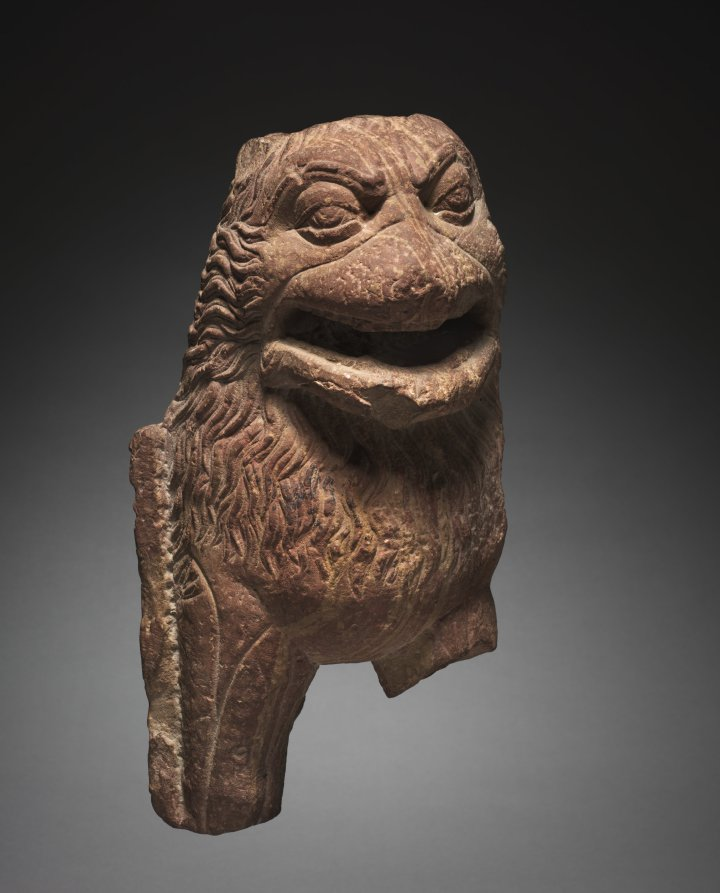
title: Lion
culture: Northern India, Uttar Pradesh, Mathura, Kushan period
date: 100s–200s CE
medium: sandstone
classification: Sculpture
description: Roaring lions such as this have been found on the throne of Kushan kings. Early sculptures of the Buddha also show him seated on a lion throne, and the roar of his teachings (dharma) extends throughout the world.